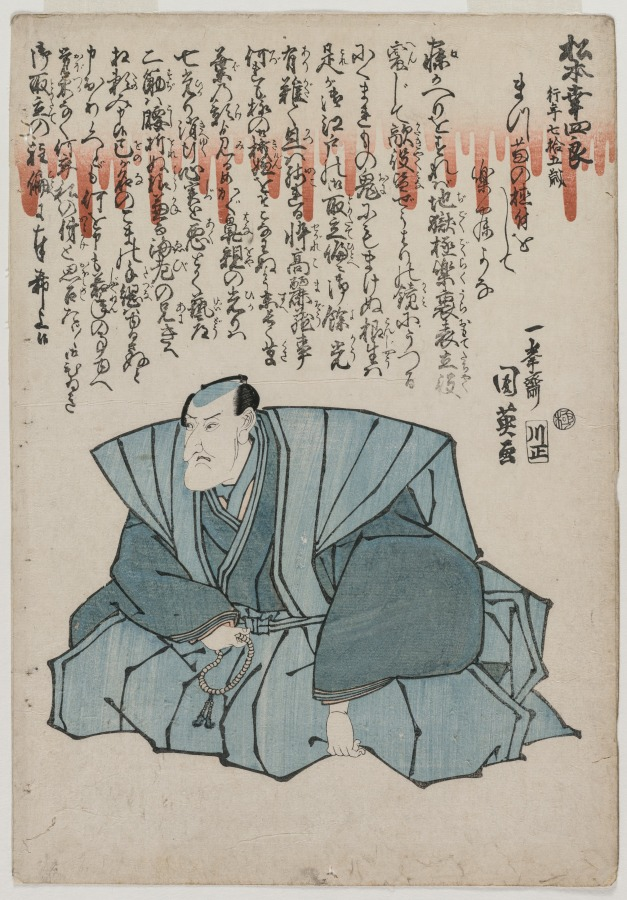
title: Memorial Portrait of Matsumoto Kōshirō V, Age 75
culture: Japan, Edo period (1615–1868)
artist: Utagawa Kunihide (Japanese, active 1820s-1850s)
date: c. 1838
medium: color woodblock print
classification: Print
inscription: Signed: 一峯斎国英画 Publisher: 川正（川口屋正蔵）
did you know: This kabuki actor was known for playing bad guys. His fans would have collected this portrait as a memento following his death in May 1838.